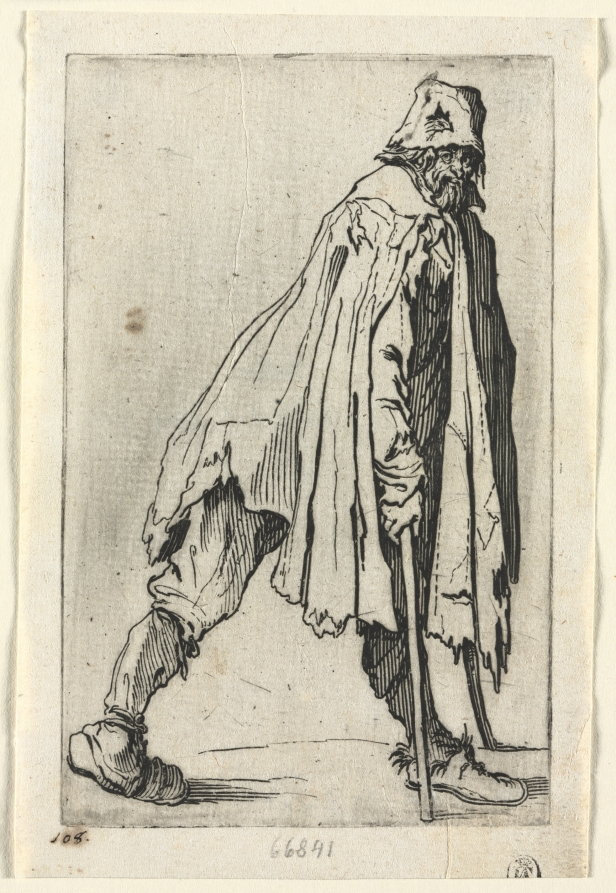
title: The Beggars: The Beggar on Crutches, Wearing a Cap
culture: France, 17th century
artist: Jacques Callot (French, 1592–1635)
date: c. 1623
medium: etching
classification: Print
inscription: Inscribed lower left in pen and brown ink: "108."